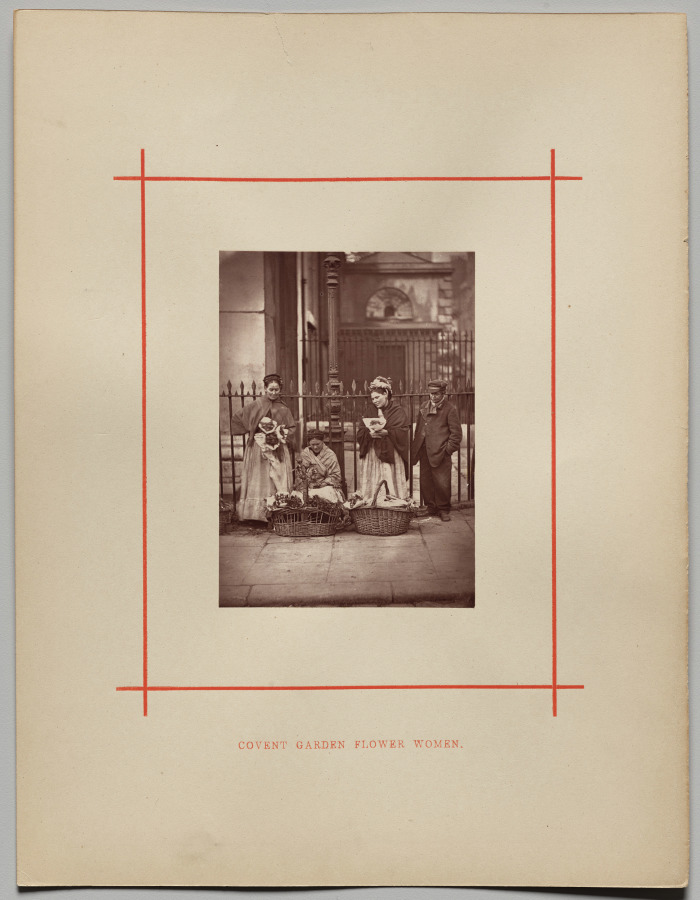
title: Covent Garden Flower Women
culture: England, 19th century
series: Street Life in London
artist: John Thomson (Scottish, 1837–1921)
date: 1877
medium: woodburytype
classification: Photograph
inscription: Stamped in red ink on recto of mount: “COVENT GARDEN FLOWER WOMEN.”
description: Thomson’s collaborator, reporter Adolphe Smith said that “The familiar sight of a poor woman holding a pale child in her arms and offering modest violets to the pedestrian, is pregnant with a poetry which rags, and dirt fail to obliterate.” The jobs, which were passed down between generations, required worked long hours and yielded a meager income.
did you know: These are the real-life counterparts of Eliza Doolittle in the musical My Fair Lady, who started out selling flowers in Covent Garden.